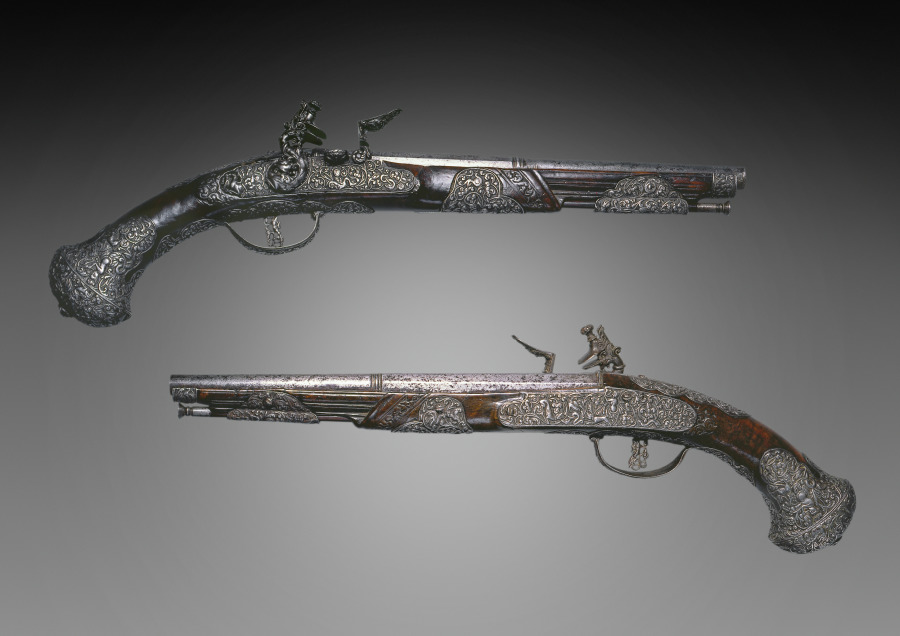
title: Pair of Flintlock Pistols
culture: Italy, Brescia, 17th century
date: c. 1670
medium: steel, chiseled decoration with walnut stock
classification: Arms and Armor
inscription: P. Moretta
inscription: CARLO LERME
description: The chiseling of gun ornament is a task comparable to sculpture on a miniature scale, carried out in an extremely hard material. Since this was usually beyond the skill of most gunsmiths, it was not uncommon for such work to be contracted out as occurred here. While the barrels are signed P. Moretta, the lock plates of these pistols are signed Carlo Lerme, who also chiseled the mounts.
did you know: This type of pistol fired only once before needing to be reloaded, so they were often produced in matched pairs. Even the trigger is decorated on these beautifully ornate weapons. Look closely to compare how a skilled craftsman carefully matched the patterning on these two guns.